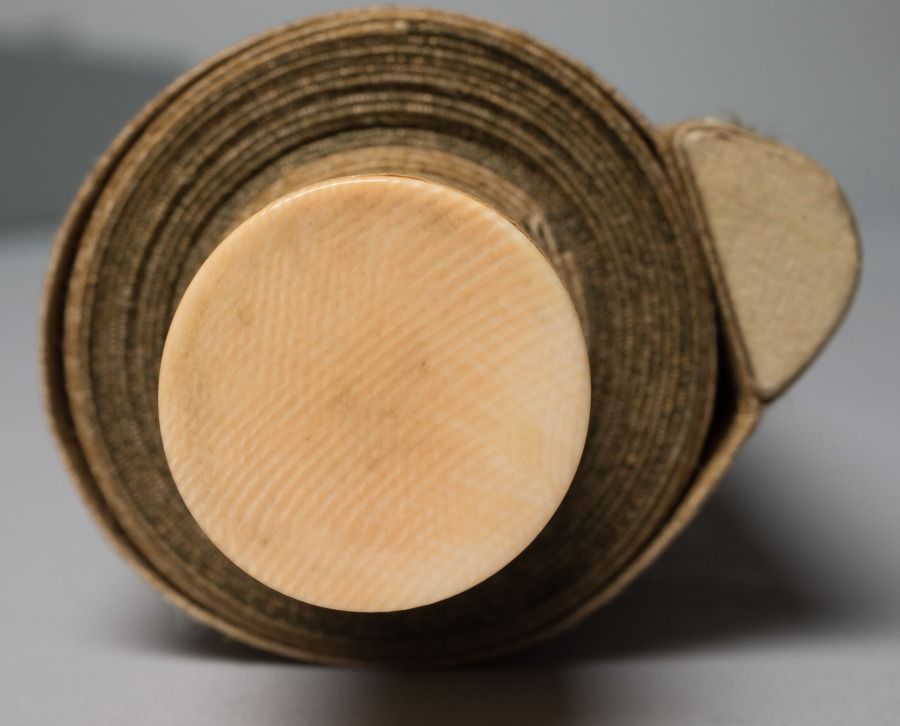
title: Landscape with a Pavilion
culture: Japan, Edo period (1615–1868)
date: c. 1700–1868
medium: hanging scroll; ink on paper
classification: Painting